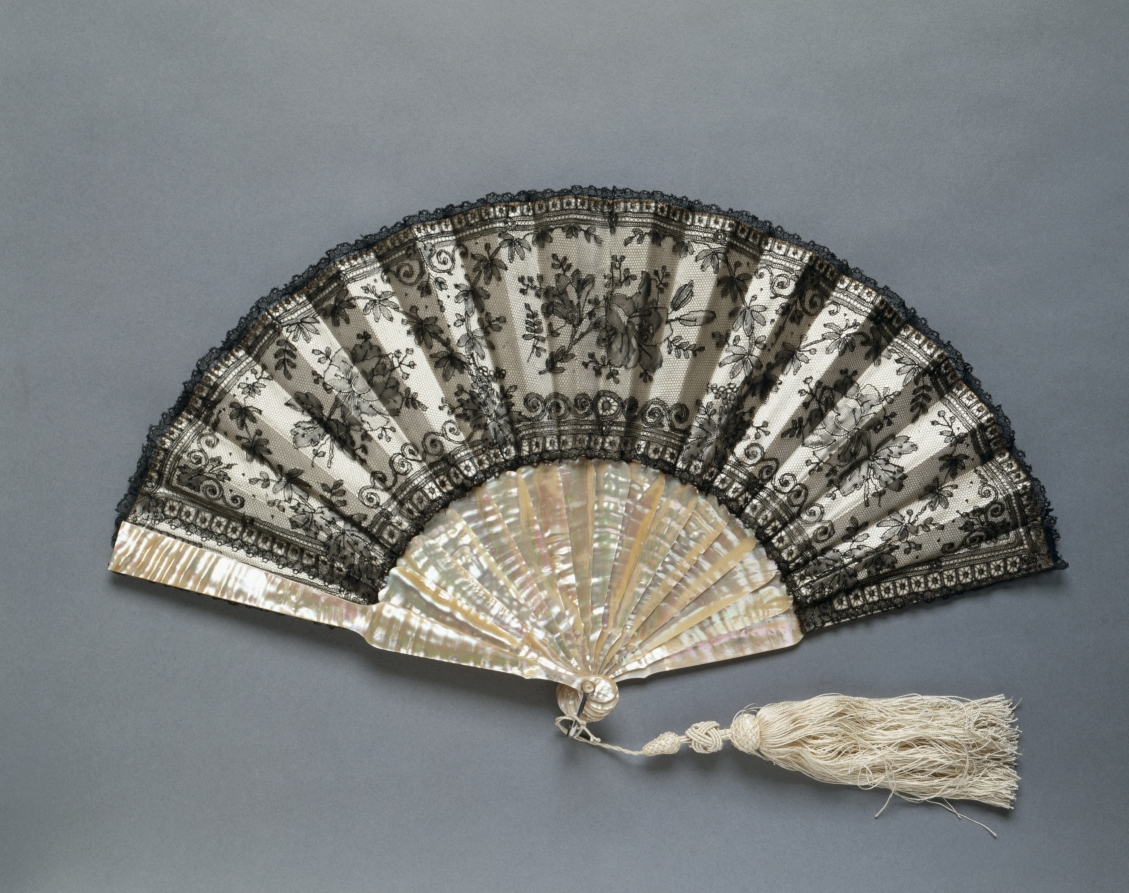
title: Folding Fan: Chantilly Lace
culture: France(?)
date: c. 1870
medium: black "Chantilly" lace over silk lining, white silk tassel; frame: mother-of-pearl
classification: Miscellaneous